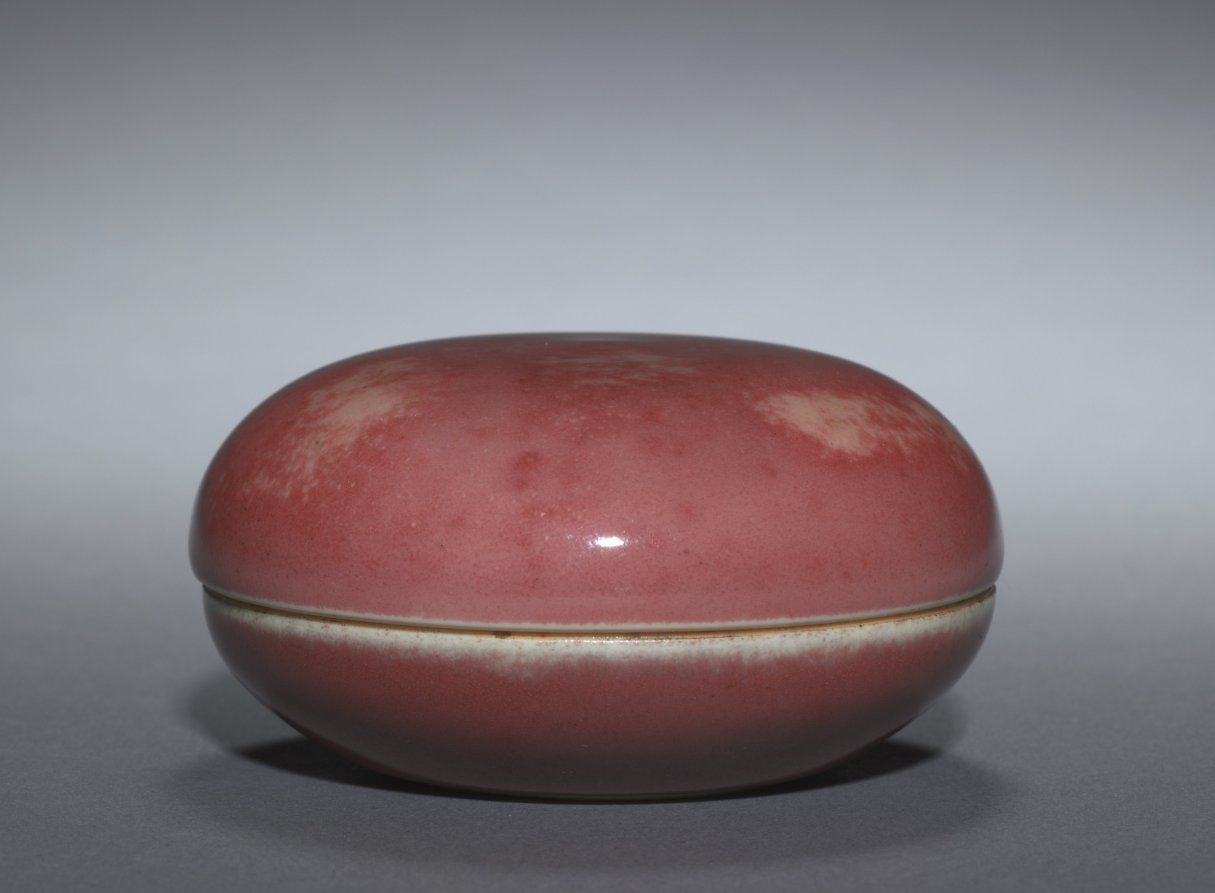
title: Seal Color Box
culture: China, Jiangxi province, Jingdezhen, Qing dynasty (1644-1911), Kangxi period (1662-1722)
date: 1662–1722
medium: porcelain with "peach bloom" glaze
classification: Ceramic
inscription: 大清康熙年制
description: The "peach-bloom" glaze developed during the Kangxi era has been described as "drunken with beauty."